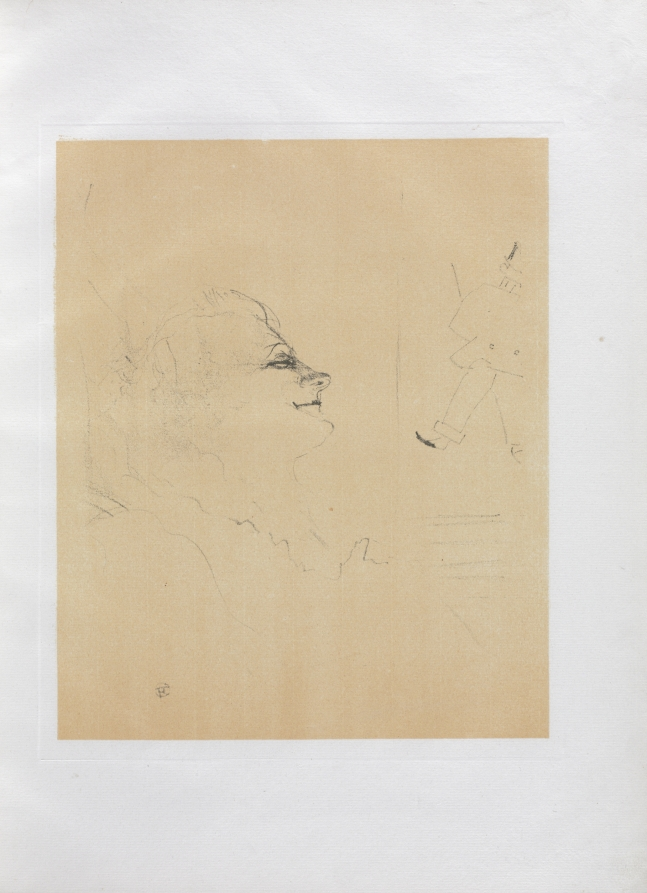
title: Yvette Guilbert-English Series: Pessima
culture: France, 19th century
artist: Henri de Toulouse-Lautrec (French, 1864–1901)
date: 1898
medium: lithograph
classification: Bound Volume